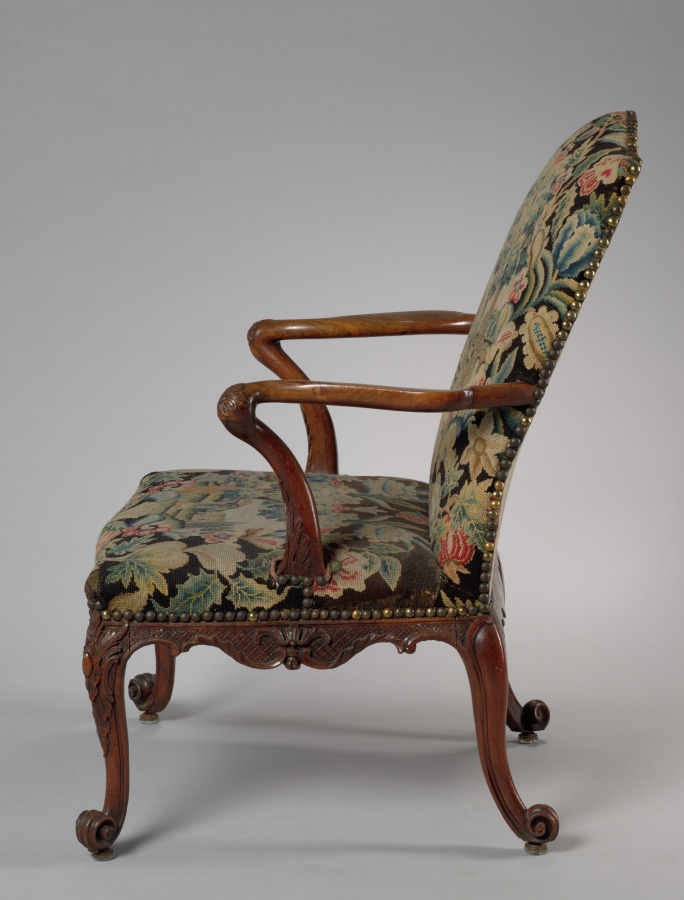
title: Armchair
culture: England, 18th century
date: 1760–1765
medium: mahogany upholstered in needlework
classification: Furniture and woodwork